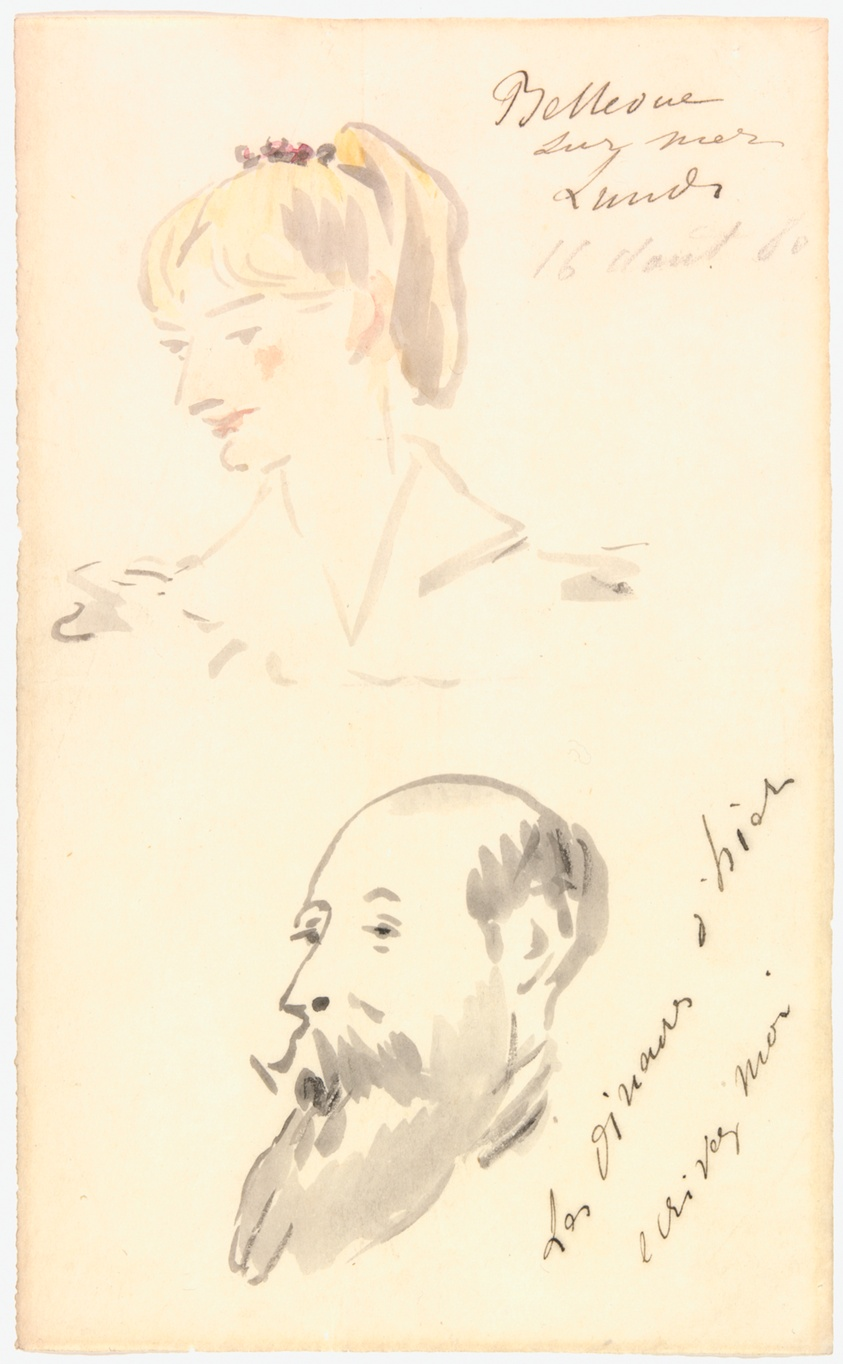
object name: Drawing and Watercolor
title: Head of a Woman and Head of a Bearded Man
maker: Édouard Manet (French, 1832-1883)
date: 1880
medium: Watercolor with pen and brown ink and graphite on cream wove paper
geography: France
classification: ink or chalk wash; drawings (visual works); prints and drawing